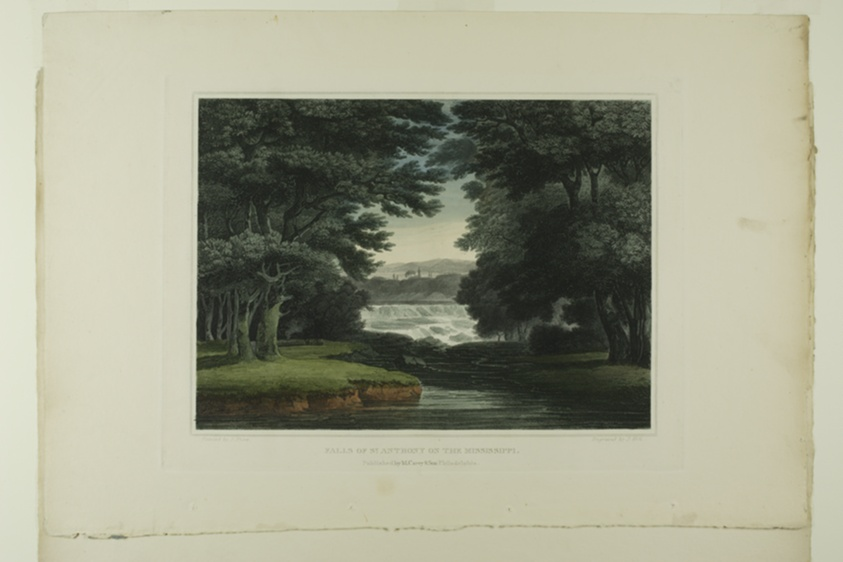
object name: Print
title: Falls of St. Anthony on the Mississippi, plate seven of the first number of Picturesque Views of American Scenery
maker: John Hill (American, 1770-1850); after Joshua Shaw (American, born England, c. 1777-1860); after a drawing by Captain Joshua Rowley Watson, R.N. (English, 1772-1818); published by Matthew Carey & Son (American, active 1795-1821)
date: 1819/21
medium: Aquatint with etching and hand-coloring on cream wove paper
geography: United States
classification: aquatint; prints and drawing; print; portfolio